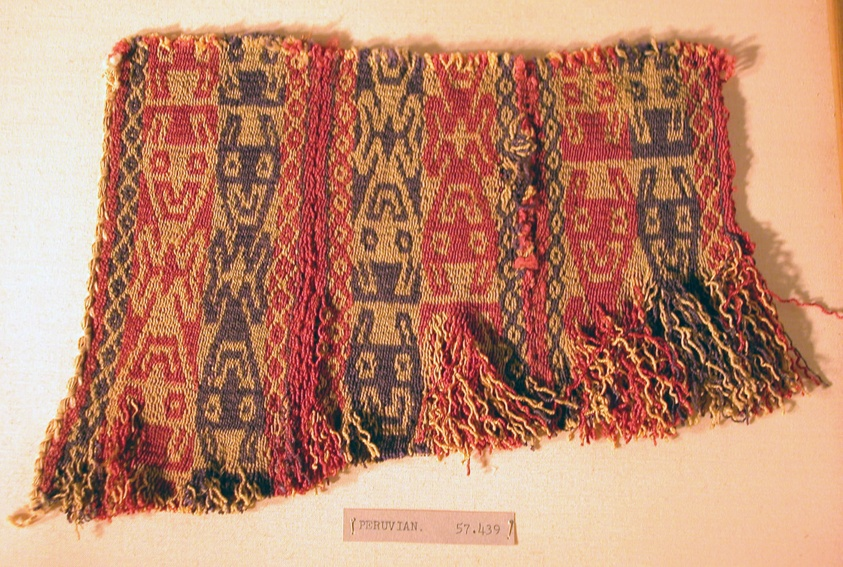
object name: Textile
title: Fragment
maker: Peru, Possibly central coast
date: A.D. 1000/1476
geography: Peru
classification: textile; weaving